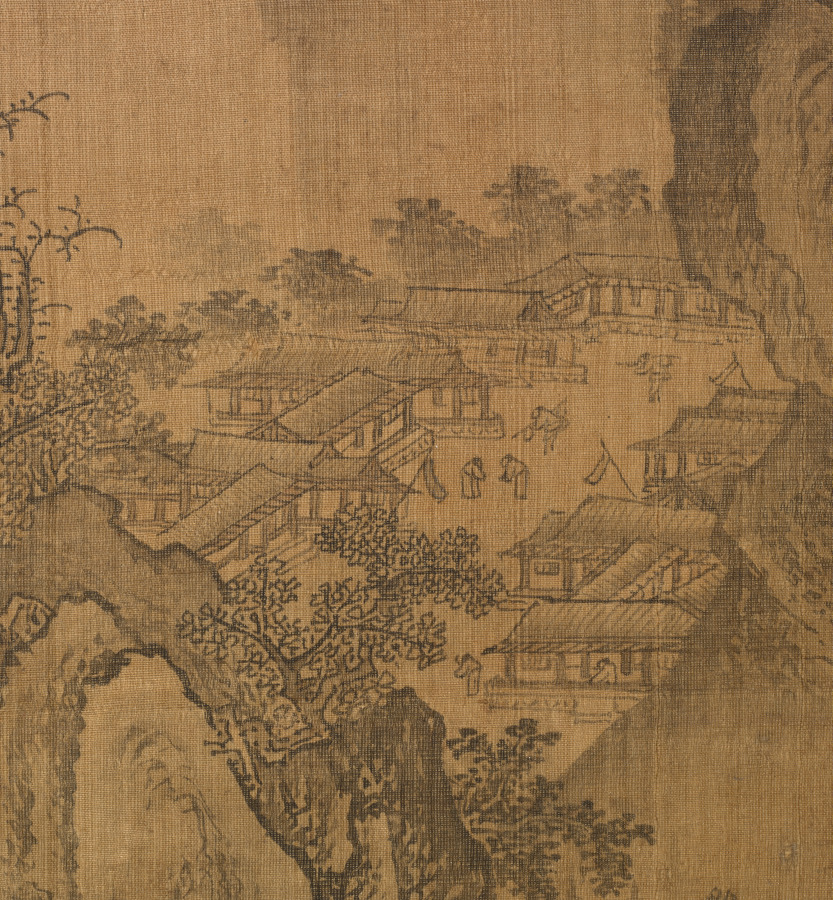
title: Mountain Market, Clear with Rising Mist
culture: Korea, Joseon dynasty (1392–1910)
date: early 1500s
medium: Hanging scroll; ink on silk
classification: Painting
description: This painting depicts several vignettes of the scholar-hermit’s various activities. In the lower left corner, the scholar-hermit is portrayed welcoming his guest in the courtyard. In the middle section on the lower bottom, the scholar and his guest are shown encountering another traveler on the bridge and exchanging their greetings. After crossing the bridge, the scholar visits a friend who lives in a compound of multiple buildings. The two friends decide to take a short walk. Both appear in a terraced cliff, enjoying a mountain vista and the fragrance of an old pine tree carried by the gentle wind. The scholar continues his journey with his two servants. They are portrayed crossing a winding wooden bridge. Right beyond the colossal rocky mountain, a panoramic view to a bustling market place unfolds, suggesting that it may be the place where the scholar-hermit’s entourage would visit. Perhaps the scholar need to buy items such as books, rolls of papers, and brushes, all essential to scholarly life. Toward the upper left corner, another group of travelers is landing on the river bank that leads to the city gate; they may be headed to the multistoried Buddhist stupa nestled on the top of the mountains.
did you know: Due to its stylistic features, this painting has long been believed to be a Chinese painting of the Northern Song period, dated to the 12th century.